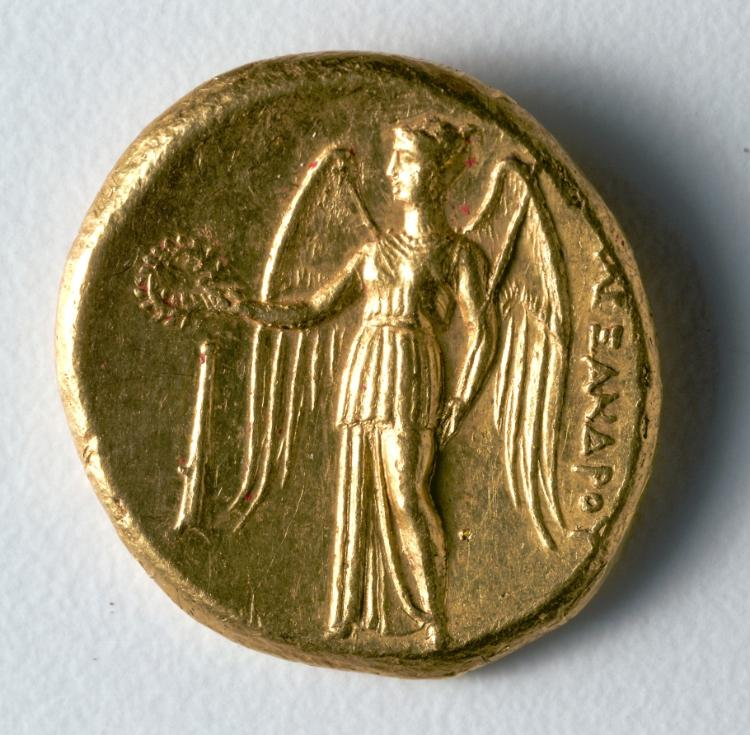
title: Stater: Nike (reverse)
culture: Greek, Macedonian, minted at Salamis (Cyprus)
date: c. 325–275 BCE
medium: gold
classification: Coins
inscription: ΑΛΕΞΑΝΔΡΟΥ